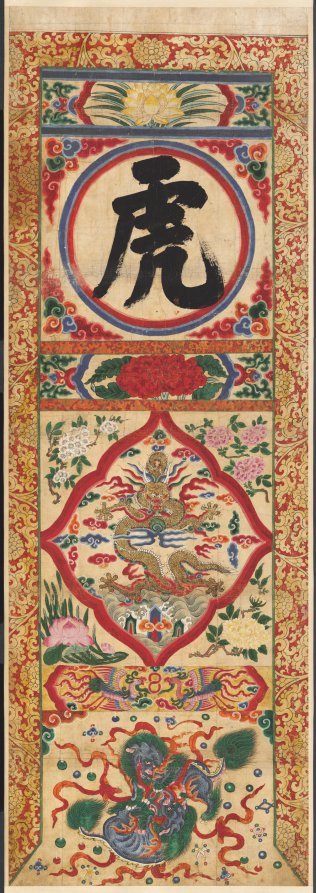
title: Painted Panel of Character "Tiger"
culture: Korea, Joseon dynasty (1392–1910)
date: early 1900s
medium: hanging scroll, ink and color on paper; unmounted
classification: Painting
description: This set of four colorful hanging scrolls may have been used in an outdoor Buddhist ritual to evoke heavenly blessings. Each hanging scroll bears four different character; tiger, dragon, whistle, and recite. Traditionally, tiger and dragon belong to the four directional guards, respectively west and east.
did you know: This set of four colorful hanging scrolls may have been used in an outdoor Buddhist ritual to evoke heavenly blessings.